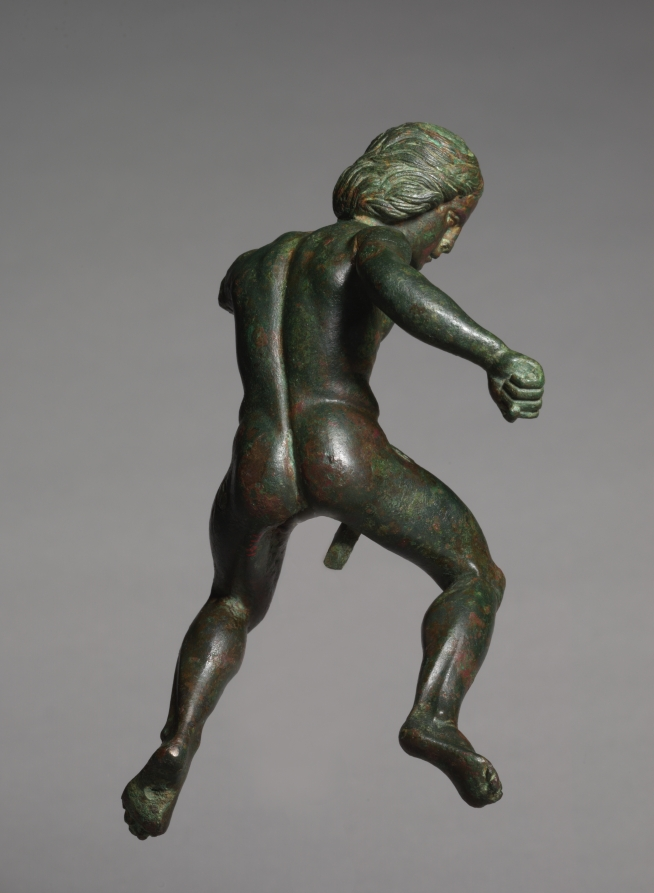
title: Rider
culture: Greece, perhaps from workshop of Tarentum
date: c. 400–375 BCE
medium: bronze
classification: Sculpture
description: Once mounted with pins upon his horse (now lost), this statuette depicts a young man participating in an equestrian race. The rider’s distinctive equipment is still barely visible: his right hand clutches the base of a goad to urge on his horse, and the first pleat of a cloak, the youth’s only covering, lays over his left shoulder.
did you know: Without stirrups, this rider’s heels turn inward to control his mount by pressing its flanks.